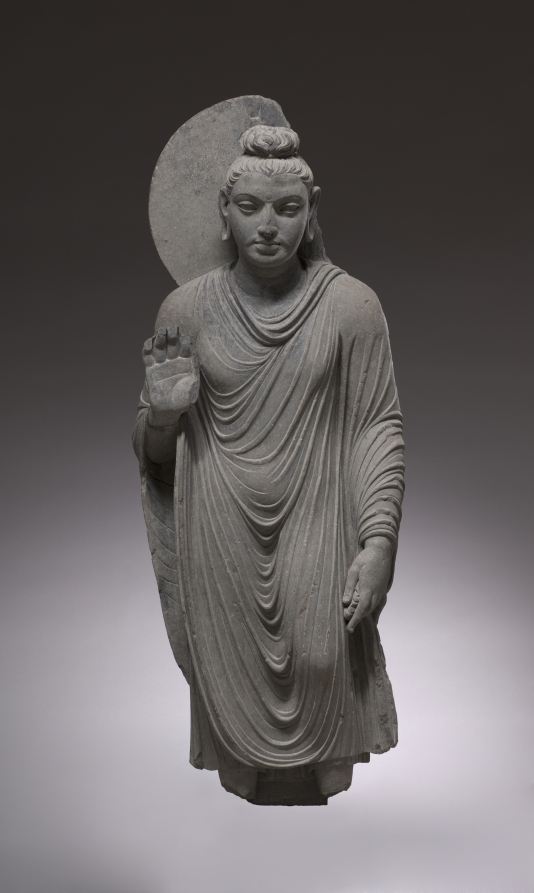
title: Standing Buddha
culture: Pakistan, Gandhara, Kushan period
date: 150–200 CE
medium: schist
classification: Sculpture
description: Combining elements from both the Mediterranean and South Asian worlds, the artists of Gandhara created a new vision of the Buddha during the period of high contact between the two regions from the 100s to 200s AD. They were among the first to show the Buddha with a placid expression, thick wavy hair, and clothed in a heavy, toga-like monk’s robe.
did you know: The cavity at the top of the head may have once held a portion of the Buddha's relics.